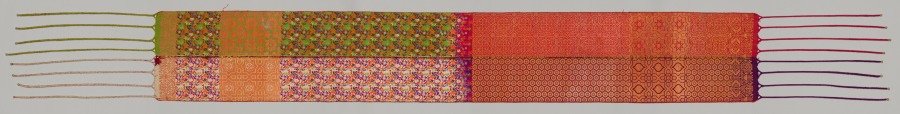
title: Belt (Hizam)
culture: Africa, North Africa, Morocco, Fes, Moroccan weaver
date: 1800s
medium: Silk, dye, metal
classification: Textile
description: Elaborate wedding sashes woven in Fez, Morocco, are distinctive for their multiple colors, designs, and uses. Folded lengthwise, they are wrapped around the waist so that the colors and designs coordinate with the attire worn during and after a wedding. Typically, the colors vary on each half although the designs are the same. Luxury textiles with elaborate patterns were woven on large looms called drawlooms that automatically repeated designs. The weaver operated the structure, inserting horizontal wefts, while the drawboy activated the programmed pattern. However, this wedding sash has ten programmed designs, which required considerable expertise.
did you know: Women sometimes added starch to stiffen these belts.